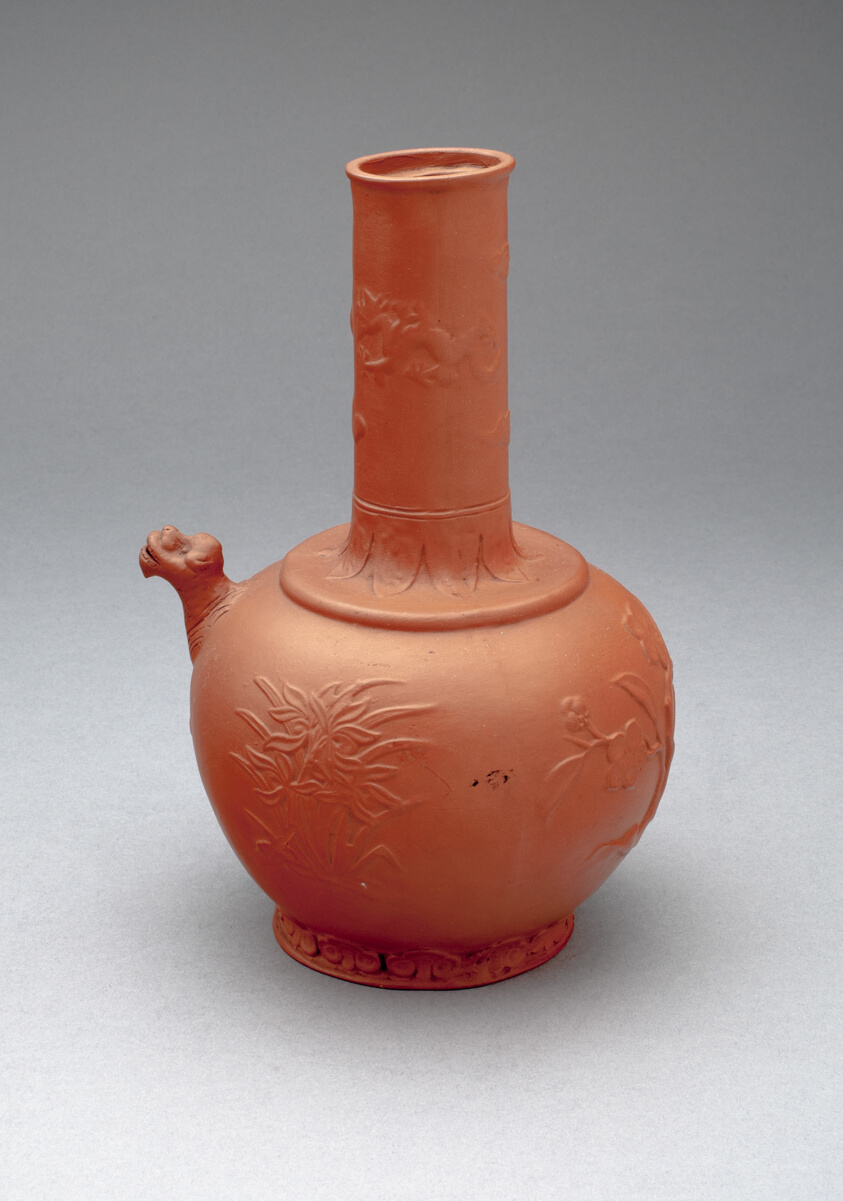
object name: Ceramics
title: Bottle (Kendi)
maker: Meissen Porcelain Manufactory (German, founded 1710)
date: c. 1710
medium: Böttger stoneware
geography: Meissen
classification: ornamental piece; stoneware; european decorative arts; ceramics